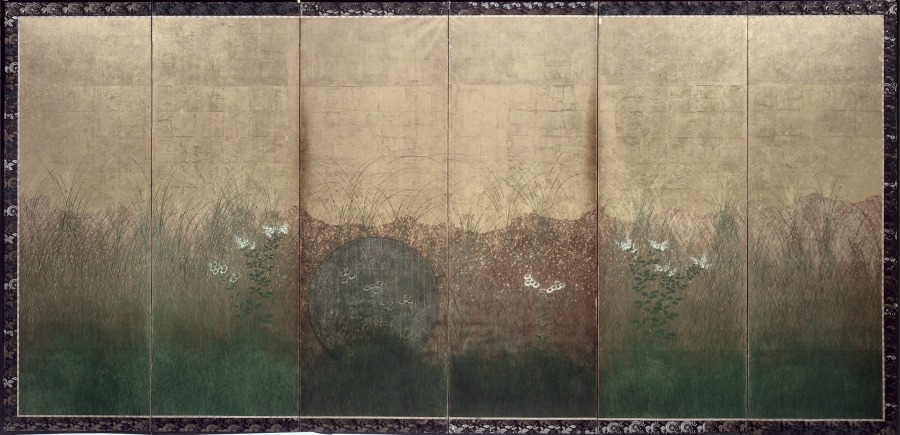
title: Autumn Evening with Full Moon on Musashino Plain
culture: Japan, Edo period (1615–1868)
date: early 1600s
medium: One of a pair of six-fold screens; ink, color, and gold and silver foil on gilded paper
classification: Painting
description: Tall grasses and autumn flowers reach out of thick green undergrowth in this depiction of the plain of Musashi, a site famous from classical Japanese poetry. A silver disc, now tarnished, represents the full moon. Flecks of cut-gold foil in the sky evoke the day’s passage into night. Once a wilderness with a vast horizon, Musashi is now densely populated.